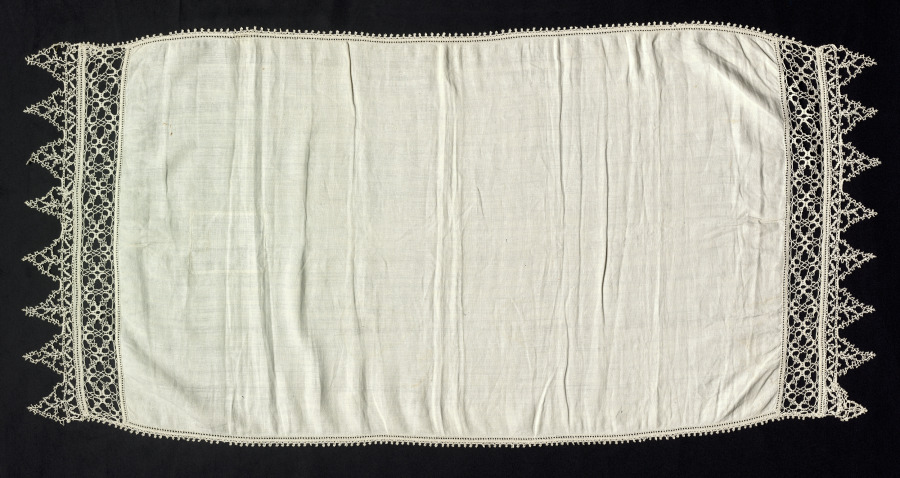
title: Lace Cloth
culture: Italy, Venice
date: 1540–60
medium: Bobbin lace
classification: Lace